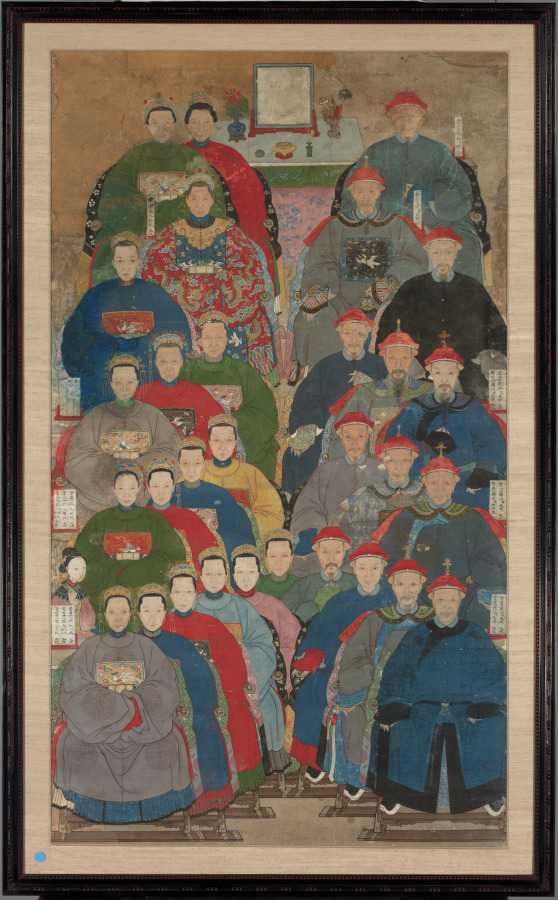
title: Ancestor Group Portrait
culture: China, Qing dynasty (1644-1911), Jiaqing period (1796-1820)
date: 1796–1820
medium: Hanging scroll; ink and color on paper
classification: Painting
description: From top to bottom this scroll features various generations of ancestors with men on the right and women on the left, 30 figures altogether. Inscribed tablets give their rank and relation within the family. Square badges on their robes indicate each figure's rank as an official. Scrolls of this type were displayed for worship at home during the New Year celebrations.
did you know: Court officials' wives could wear the same rank badge as their spouses.